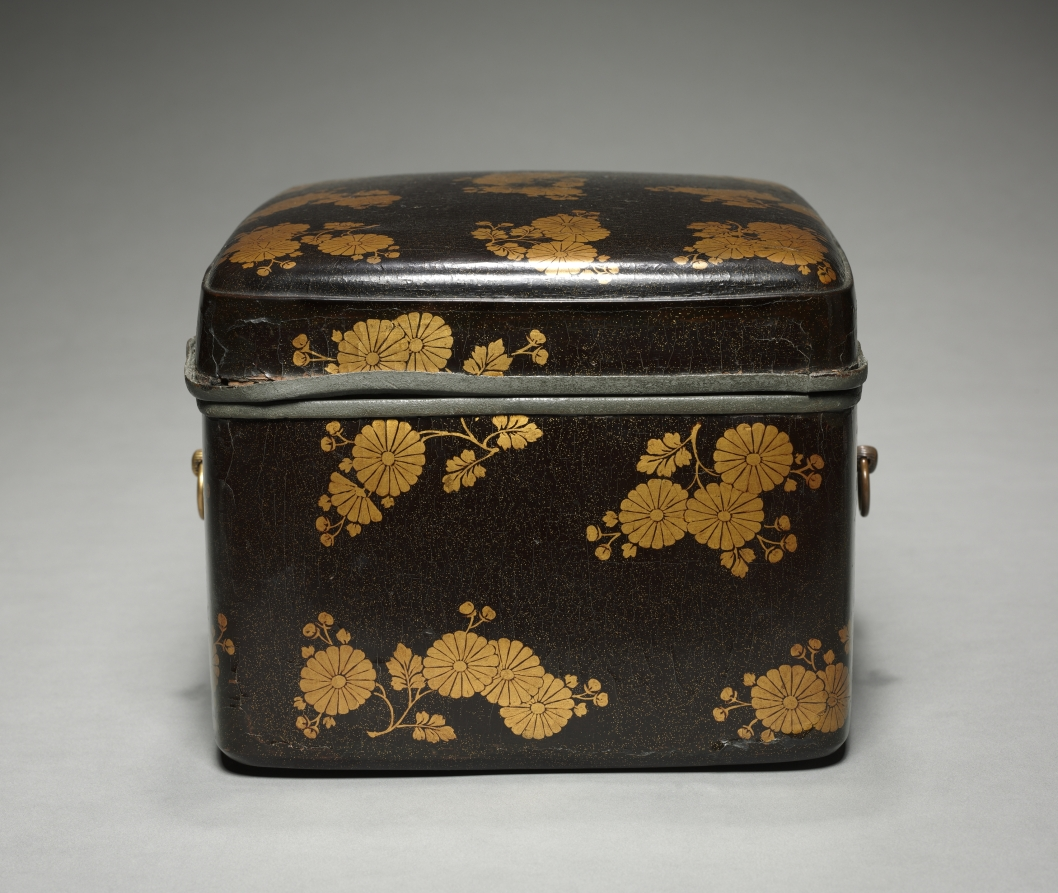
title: Cosmetics Box with Chrysanthemums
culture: Japan, Kamakura period (1185–1333)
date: early 1300s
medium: lacquer on wood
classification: Lacquer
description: In China, the chrysanthemum was historically appreciated for its association with the Double Nine Festival and the reclusive life of the poet Tao Yuanming (AD 365-427). In Japan, the 16-petaled chrysanthemum came to symbolize the Japanese imperial family after Emperor Gotoba (1180-1239) chose the motif as his personal emblem, having it applied to his sword and everyday utensils. This box proves that the flower also appeared on lacquer wares as early as the Kamakura period.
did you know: In Japanese, this type of small box is called a tebako, literally a hand box, and was typically part of a cosmetics set.